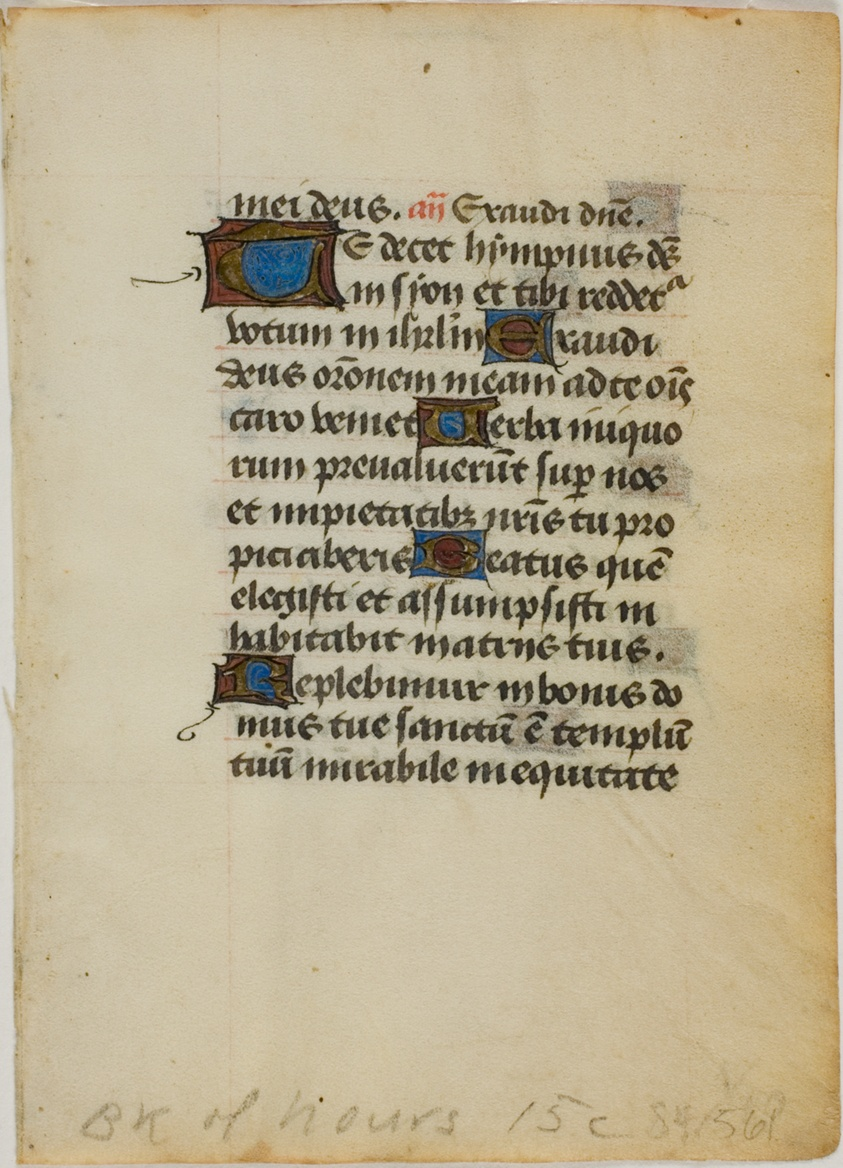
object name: Drawing and Watercolor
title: Illuminated Manuscript Leaf from a Book of Hours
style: medieval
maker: European; 13th-14th centuries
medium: Manuscript cutting with inscriptions in black ink, ruled in red, and tempera and gold leaf illuminated letters and decorations, on vellum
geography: Europe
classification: pen and ink drawings; manuscript; drawings (visual works); prints and drawing